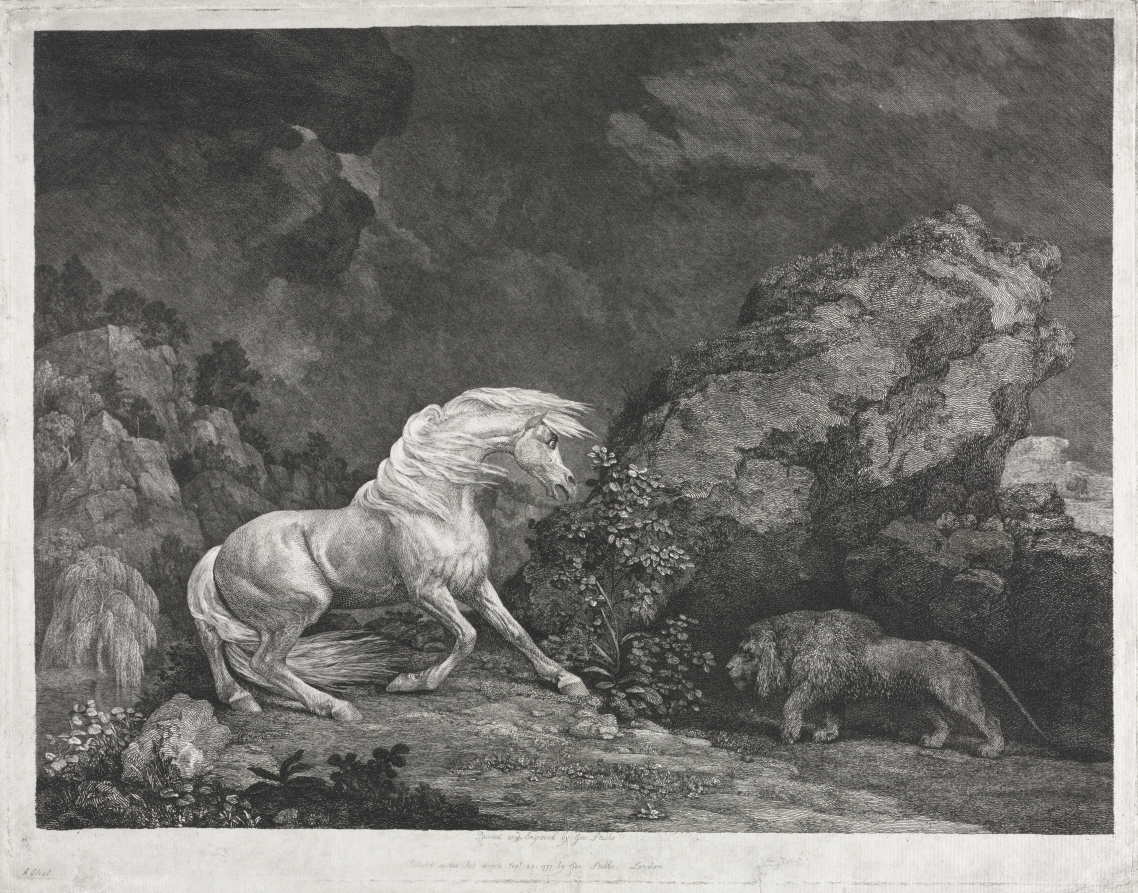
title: A Horse Frightened by a Lion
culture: England, 18th century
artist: George Stubbs (British, 1724–1806)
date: 1777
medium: etching and engraving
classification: Print